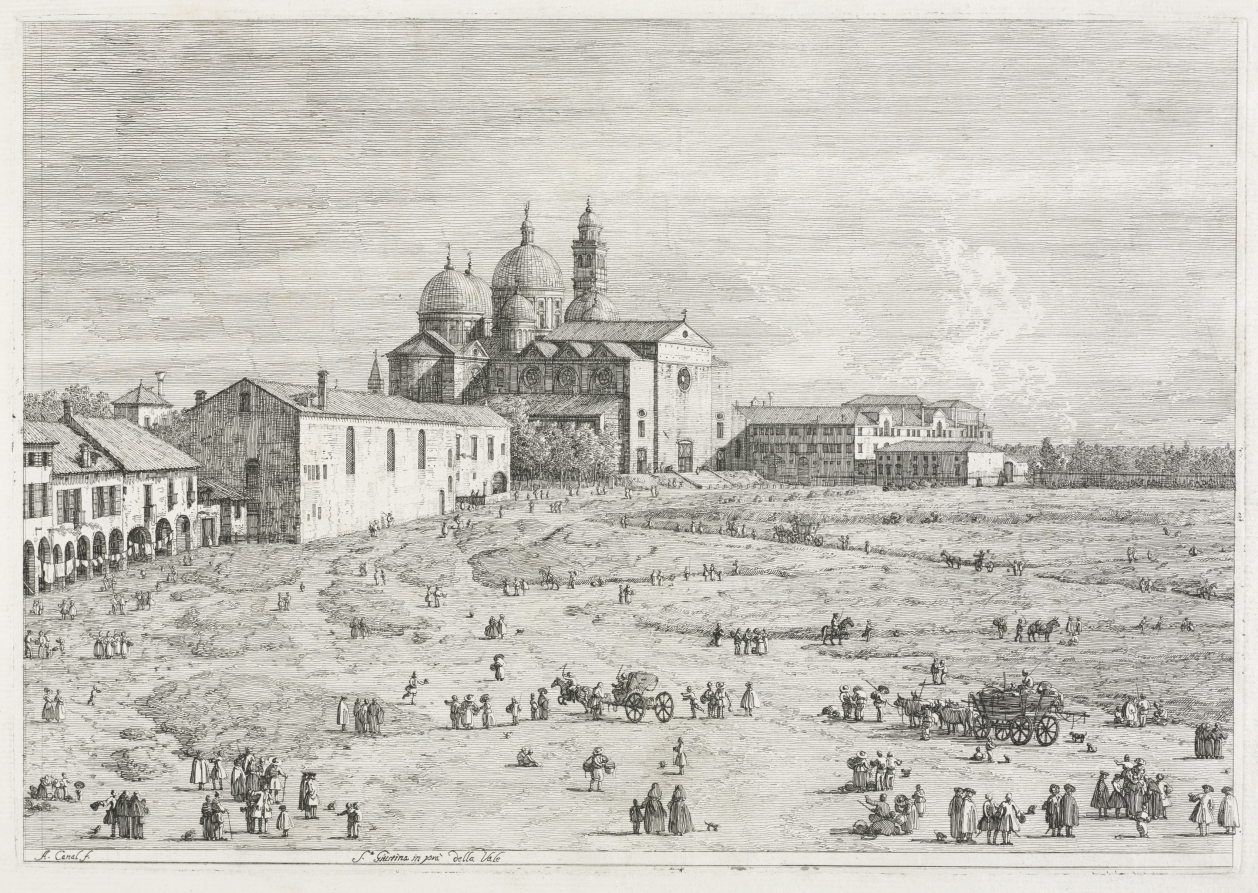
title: Views: Church of Saint Justina in Prà della Valle, Padua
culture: Italy, Venice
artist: Antonio Canaletto (Italian, 1697–1768)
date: 1735–1746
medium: etching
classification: Print